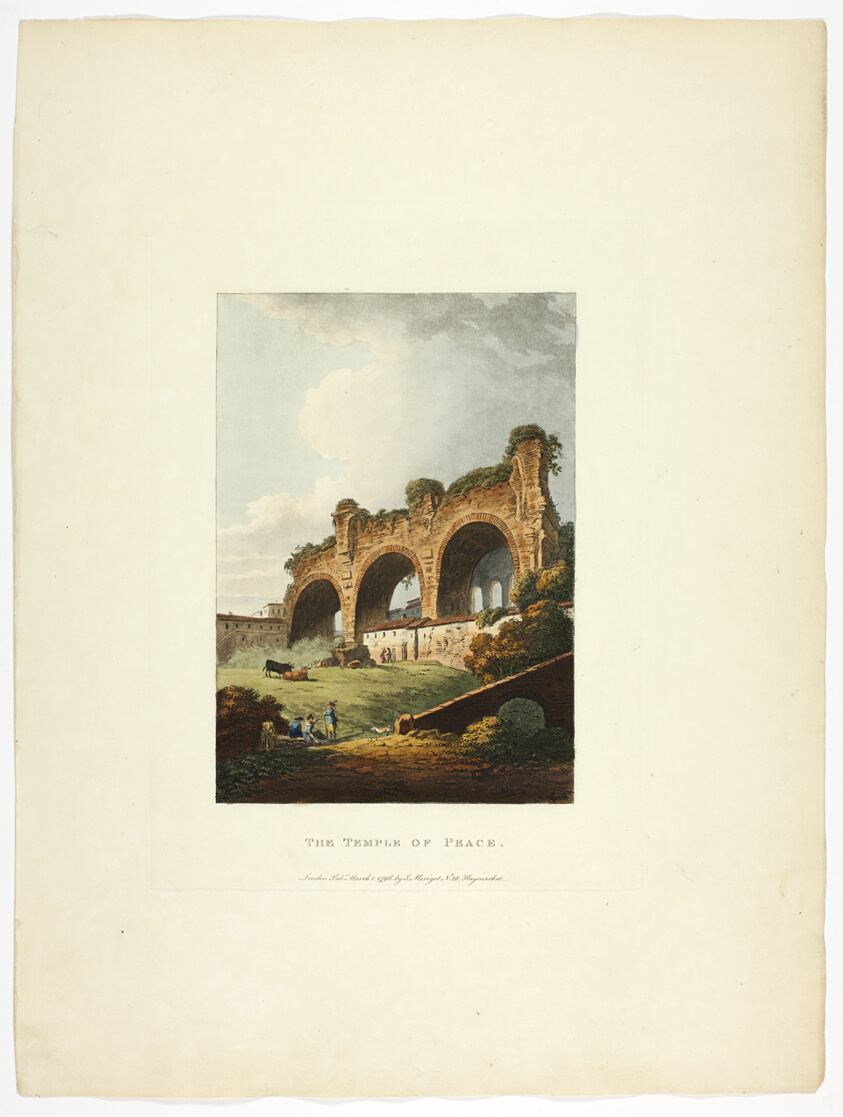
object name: Print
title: The Temple of Peace, plate nine from the Ruins of Rome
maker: M. Dubourg, (English, active 1786-1838); published by J. Merigot (Italian, Unknown)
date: published March 1, 1796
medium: Hand-colored aquatint on paper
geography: England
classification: aquatint; print; prints and drawing